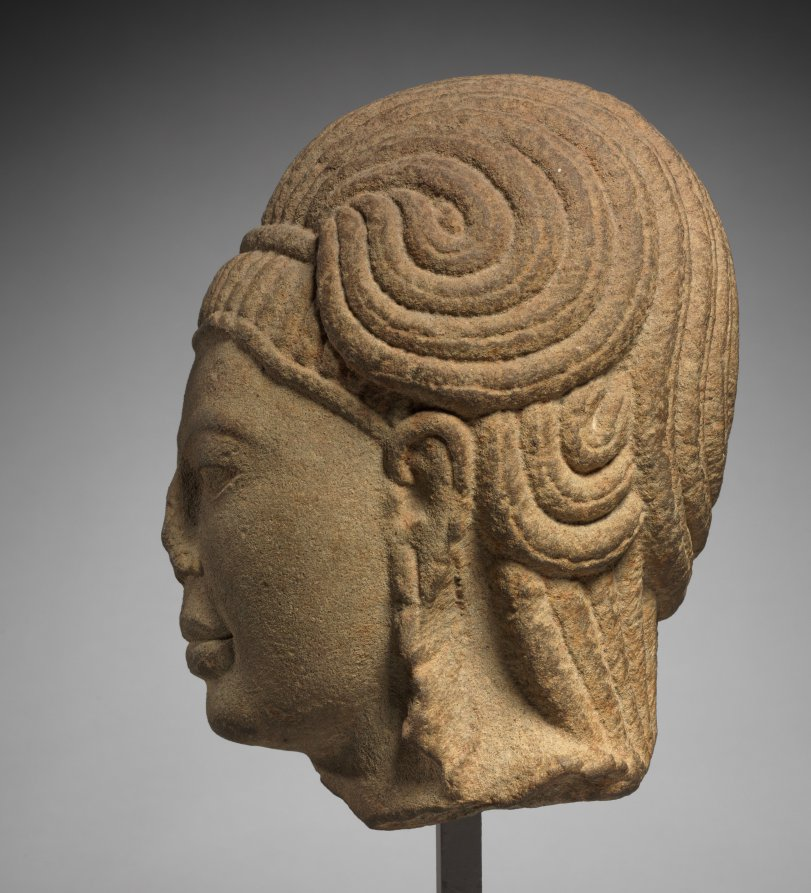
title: Head of Male Deity, possibly Aiyanar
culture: Central Thailand, Phetchabun province, possibly Si Thep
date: 600–650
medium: sandstone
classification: Sculpture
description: The dreadlocks suggest that this figure is related to the Hindu god Shiva, and the sensitive rendering of the facial features indicates that it was carved during the early phase of stone sculpture production in Thailand. A more complete sculpture of another male figure with dreadlocks and youthful features is known from Thailand and shows him seated with one knee up, supported by a yoga strap. In South India, a deity of this description is worshiped as a guardian on the outskirts of villages on the banks of ponds and reservoirs, known as Aiyanar, which means "Lord" in the Tamil language. Alternatively, this figure could be an ascetic, or follower of Shiva.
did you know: This figure may depict a deity who protects travelers on their way.